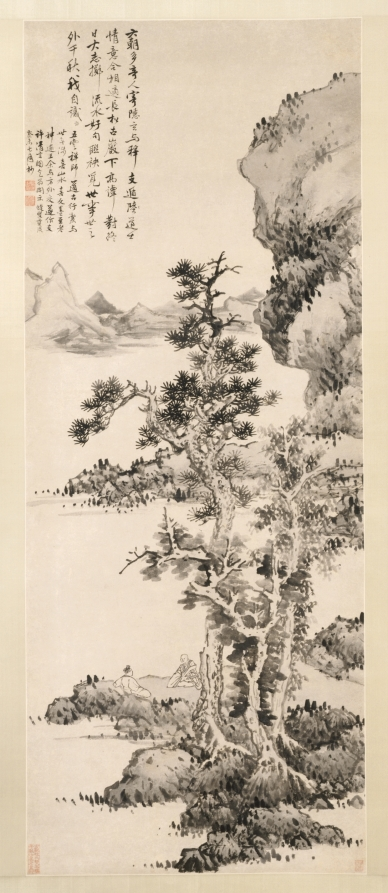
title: Zhi and Xu's Pure Conversation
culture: China, Ming dynasty (1368–1644)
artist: Lan Ying (Chinese, 1585–after 1664)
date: 1643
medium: Hanging scroll; ink on paper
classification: Painting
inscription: 六朝多奇人，寄隱玄與釋。/ 支遁許道士，情意合相適。/ 長松古巖下，高譚對終日。/ 大志擲流水，好句聯袂覓。/ 世事世之外，千秋我自識。 五雲禪師道古行潔，與世無涉。喜山水，喜文 墨。至老神逾王。余與方外交，遂作支許清言 圖，乞為開示。 蝶叟藍瑛癸未七月杪。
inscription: 2 additional seals of Cheng Qi 程琦 (1911–1988)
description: Lan Ying’s painting is a gift to his friend, the Chan monk Wuyun, in which he depicted two sages of the Six Dynasties period: the Buddhist monk Zhidun (314–366 CE), and the Daoist priest Xu Xun (265–420 CE). Meant to be understood as an analogy of the friendship between artist and monk, the painting also offered a retreat into the past, a year before the fall of the Ming dynasty. A professional painter born in Hangzhou, Lan Ying is traditionally considered a last representative of the Zhe school. Lan wrote poetic inscriptions and interacted with the literatus Chen Jiru (1558–1639).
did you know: This painting serves as an analogy of the friendship between artist and monk.